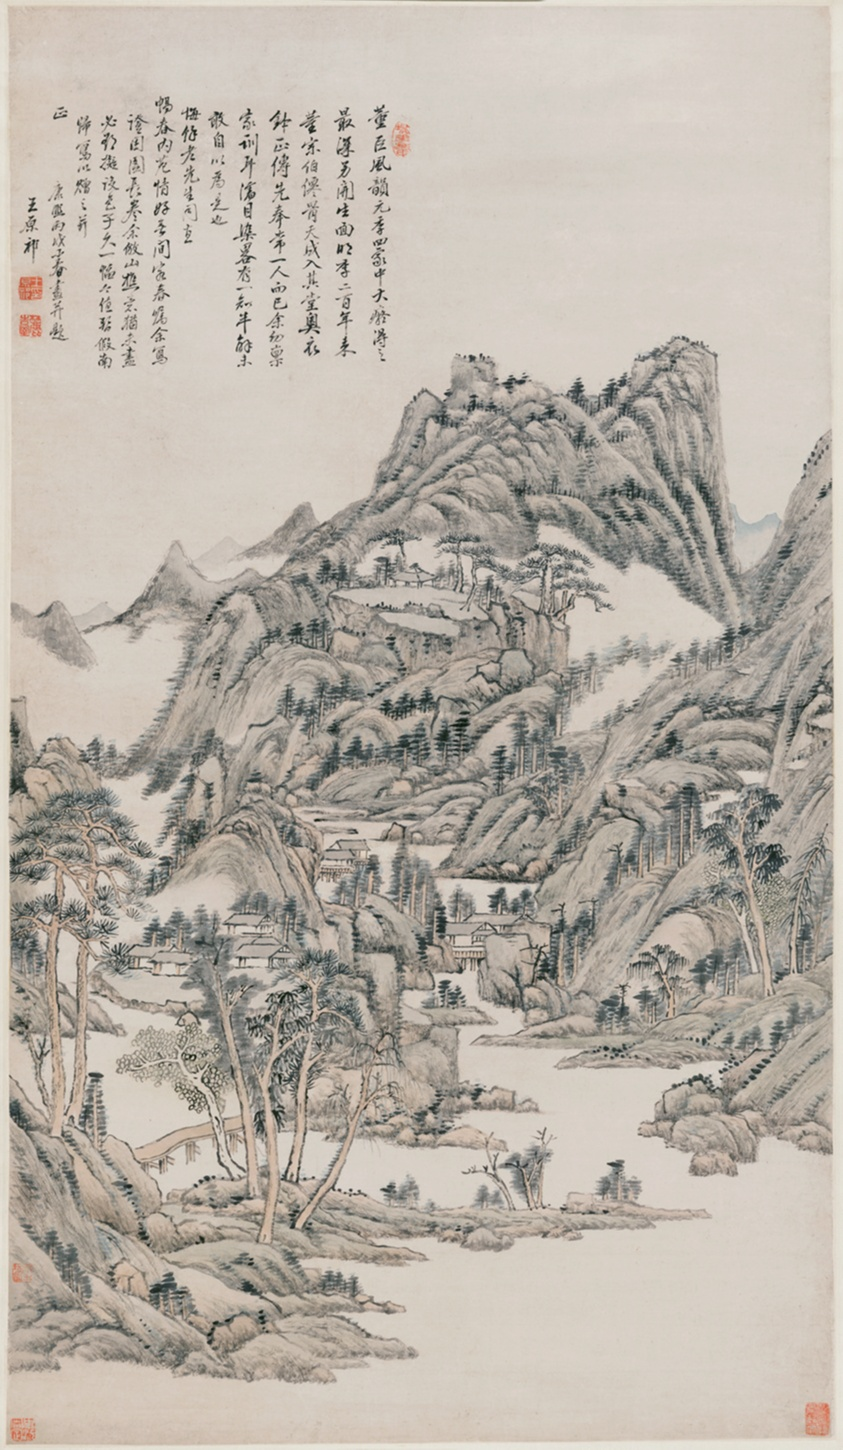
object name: Painting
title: Landscape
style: Chinese (culture or style)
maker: Wang Yuanqi (Attributed to); Chinese, 1642-1715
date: Qing dynasty (1644–1912), 1706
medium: Hanging scroll; ink and color on paper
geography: China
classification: hanging scroll; painting; asian art